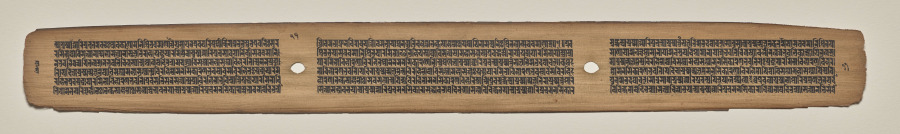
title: Text, Folio 11 (verso), from a Manuscript of the Perfection of Wisdom in Eight Thousand Lines (Ashtasahasrika Prajnaparamita-sutra)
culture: Eastern India, Bihar, Vikramashila Monastery. Painting: Nepal, Kathmandu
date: Sunday, September 14, 1119 (year 239 of the Newar Samvat in the month of Ashvina)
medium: gum tempera and ink on palm leaves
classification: Painting